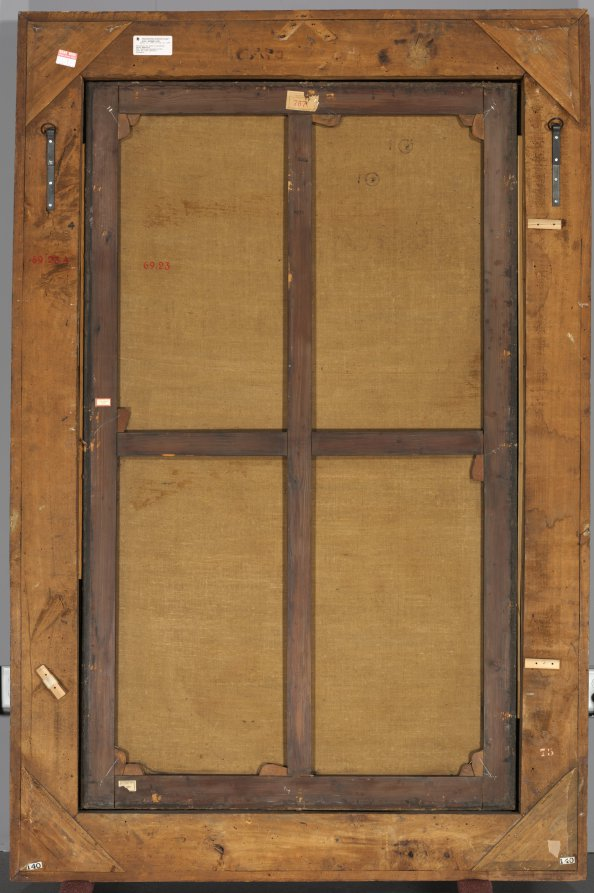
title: Saint Ambrose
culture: Spain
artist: Francisco de Goya (Spanish, 1746–1828)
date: c. 1796–99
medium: oil on canvas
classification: Painting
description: This work belongs to a series depicting Ambrose, Jerome, Augustine, and Gregory, key figures of early Catholicism. Saint Ambrose (about AD 340–391), the bishop of Milan, resolved important theological conflicts within the church and worked effectively with advocates of Roman paganism. The low viewpoint and large scale suggest that this painting hung high on the wall of a religious institution, but its original location remains unknown. In the late 1700s, Spain expelled all the Jesuits and sparked a transformation of the church. Many of these reformers turned back to early church history for inspiration, and this painting was probably commissioned by one of these new organizations.